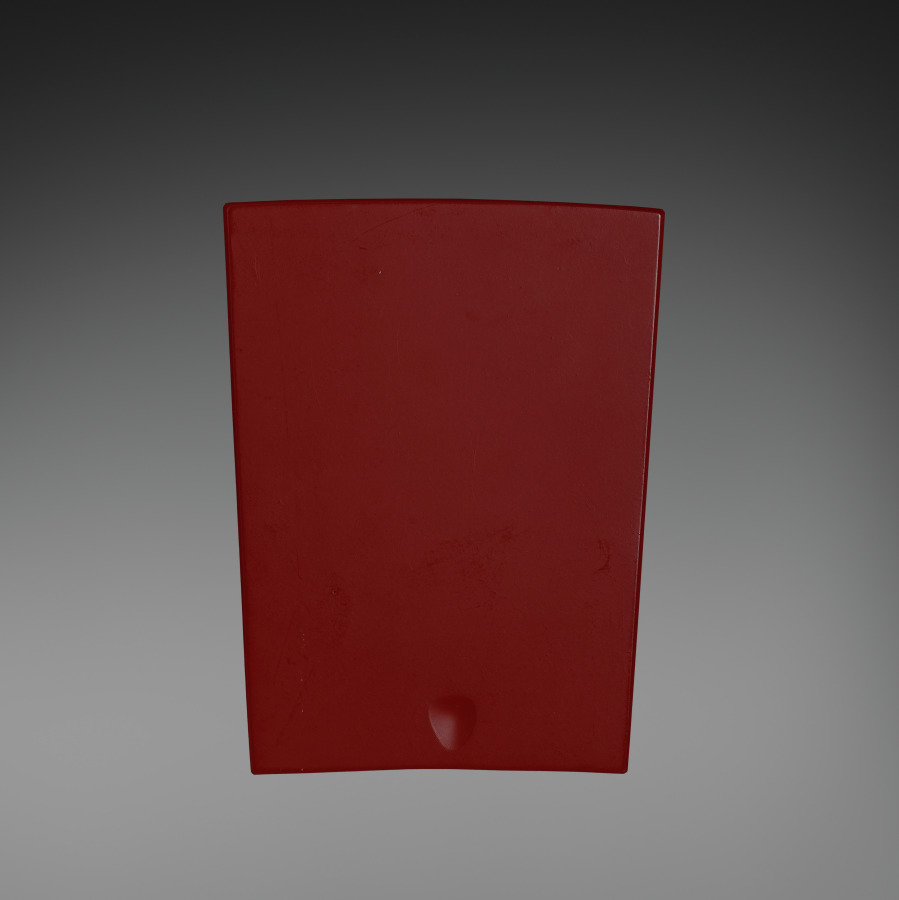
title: Section of the Two Pigeons Panel (Panneau deux pigeons)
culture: France, 20th century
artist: René Lalique (French, 1860–1945)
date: 1914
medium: molded glass with mirrored backplate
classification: Glass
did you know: The title of this work translates to curved panels with two pigeons.